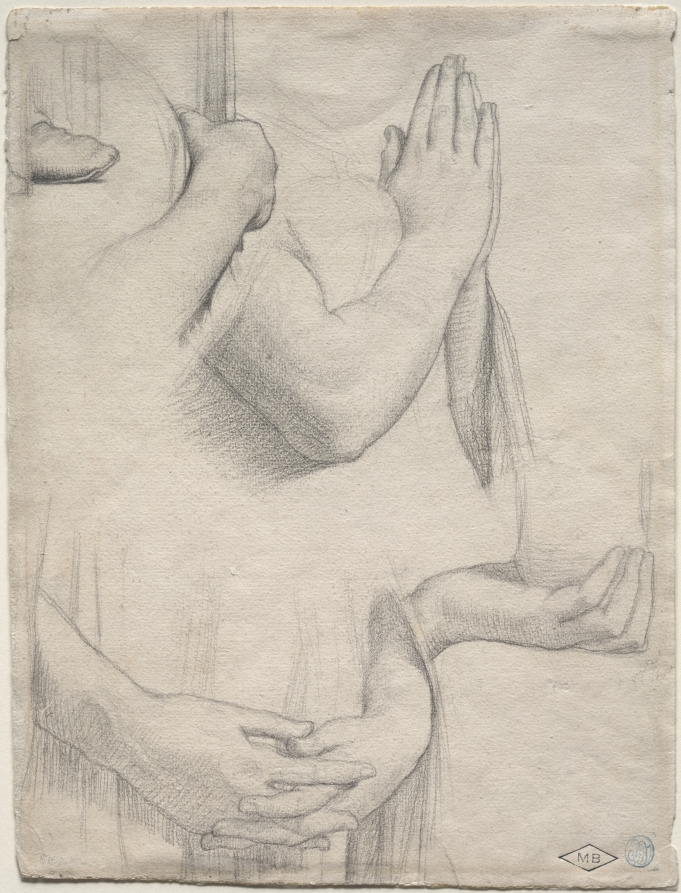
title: Study of Hands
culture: France, 19th century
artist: Jean-Auguste-Dominique Ingres (French, 1780–1867)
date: 1842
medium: graphite with traces of white heightening on ivory laid paper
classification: Drawing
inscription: inscribed, at bottom left, in pencil: Ste [illegible]; middle right (beneath knuckles), in graphite: Ste Marguerite / d’Ecosse; upper left (beneath foot), in graphite: Clotild; upper left (between toes and wrist), in graphite: Clotild; stamped, at lower right, in black ink: Marc Bernheim [Lugt 3528]; in blue ink: the artist’s studio stamp [Lugt 1477]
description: This sheet of studies was made as a preparatory design for a series of stained glass windows for the Chapel of Saint Ferdinand in Paris. Here, Jean- Auguste-Dominique Ingres sketched four sets of hands that seem to cascade down the page in one rhythmic motion, masterfully illustrating the beauty of mise en page. In his use of graphite, Ingres alluded to the metalpoint drawings of Raphael, intentionally channeling the Renaissance master.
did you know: Ingres executed many studies for each of his stained glass designs, from preliminary sketches such as this one to full-scale cartoons.